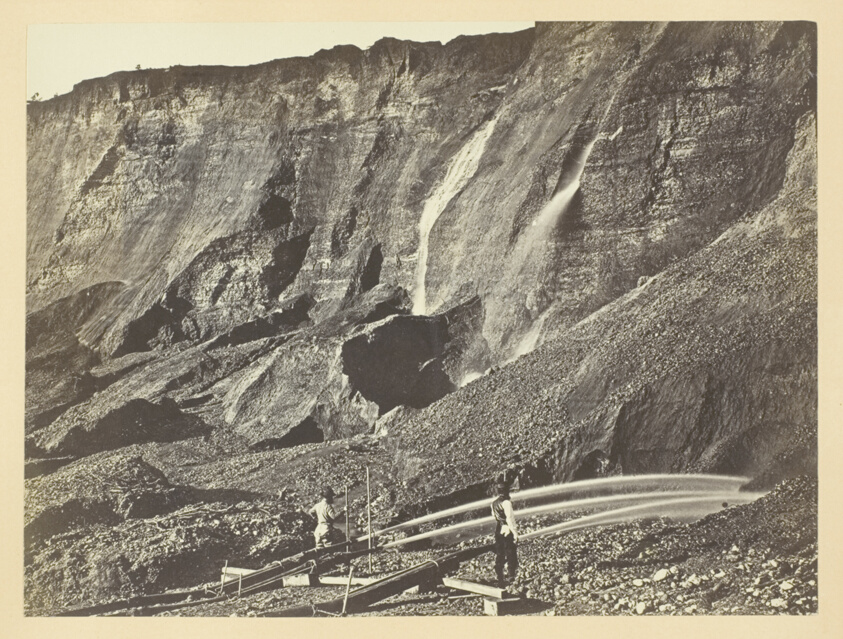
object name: Photograph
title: Hydraulic Gold Mining, Near Dutch Flats, California, C. P. R. R.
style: 19th century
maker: Andrew J. Russell; American, 1830–1902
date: 1868/69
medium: Albumen print, pl. XXX from the album "Sun Pictures of Rocky Mountain Scenery" (1870)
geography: United States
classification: photograph; albumen silver print; photography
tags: Collected by Hugh Edwards